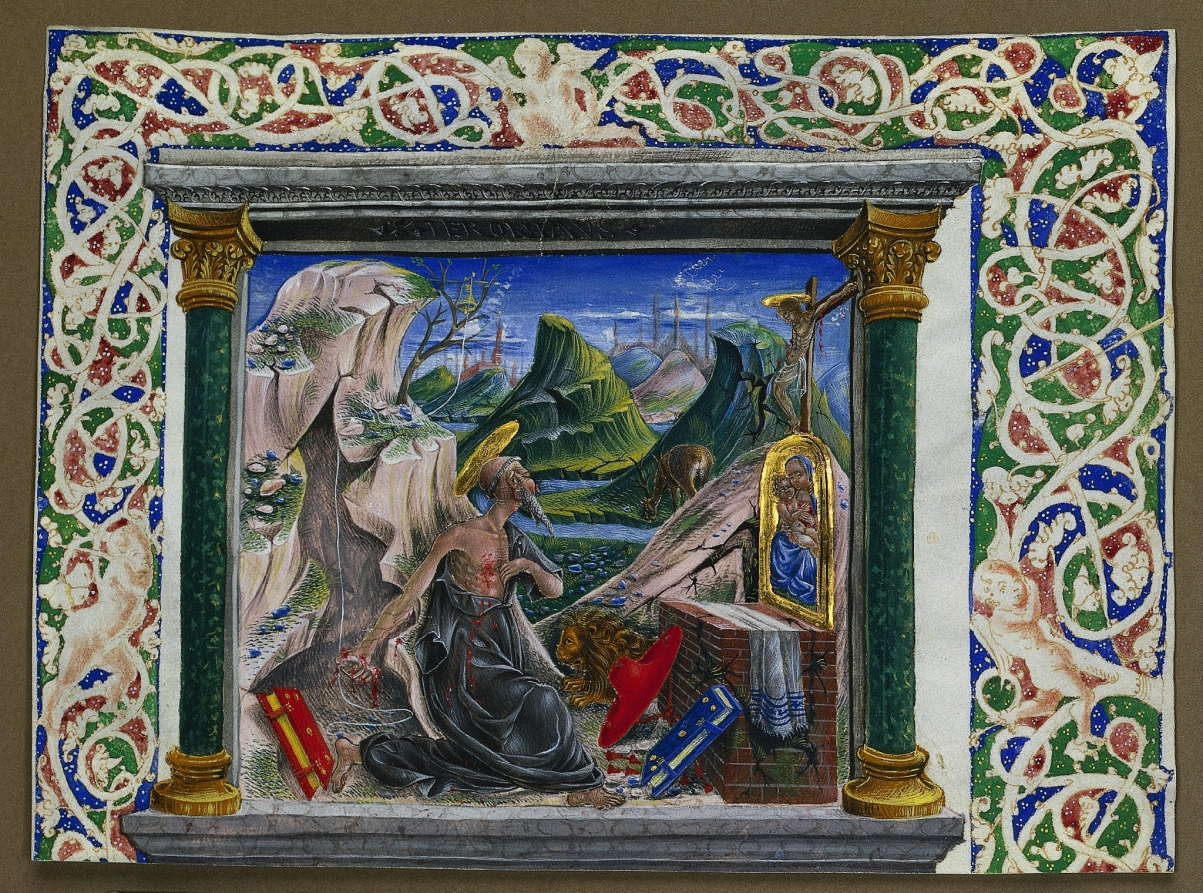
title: Miniature Excised from a Manuscript: St. Jerome in the Wilderness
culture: Italy, Ferrara, 16th century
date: c. 1500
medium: tempera and gold on parchment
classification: Manuscript